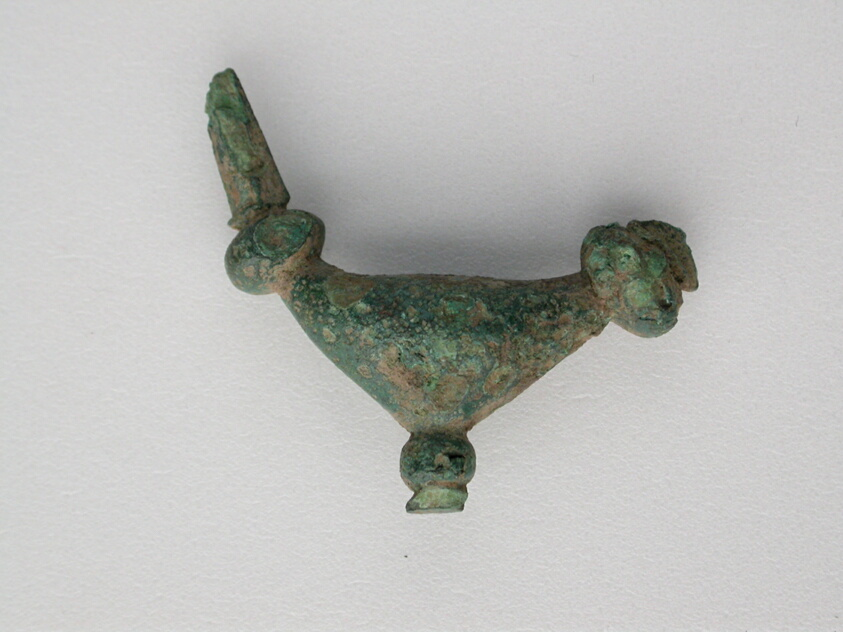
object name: Costume and Accessories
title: Fibula (leech type)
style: geometric, ancient, greek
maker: Greek; Thessaly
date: Geometric Period (800–700 BCE)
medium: Bronze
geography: Thessalía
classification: votive offering; ex-voto; fibula; costume